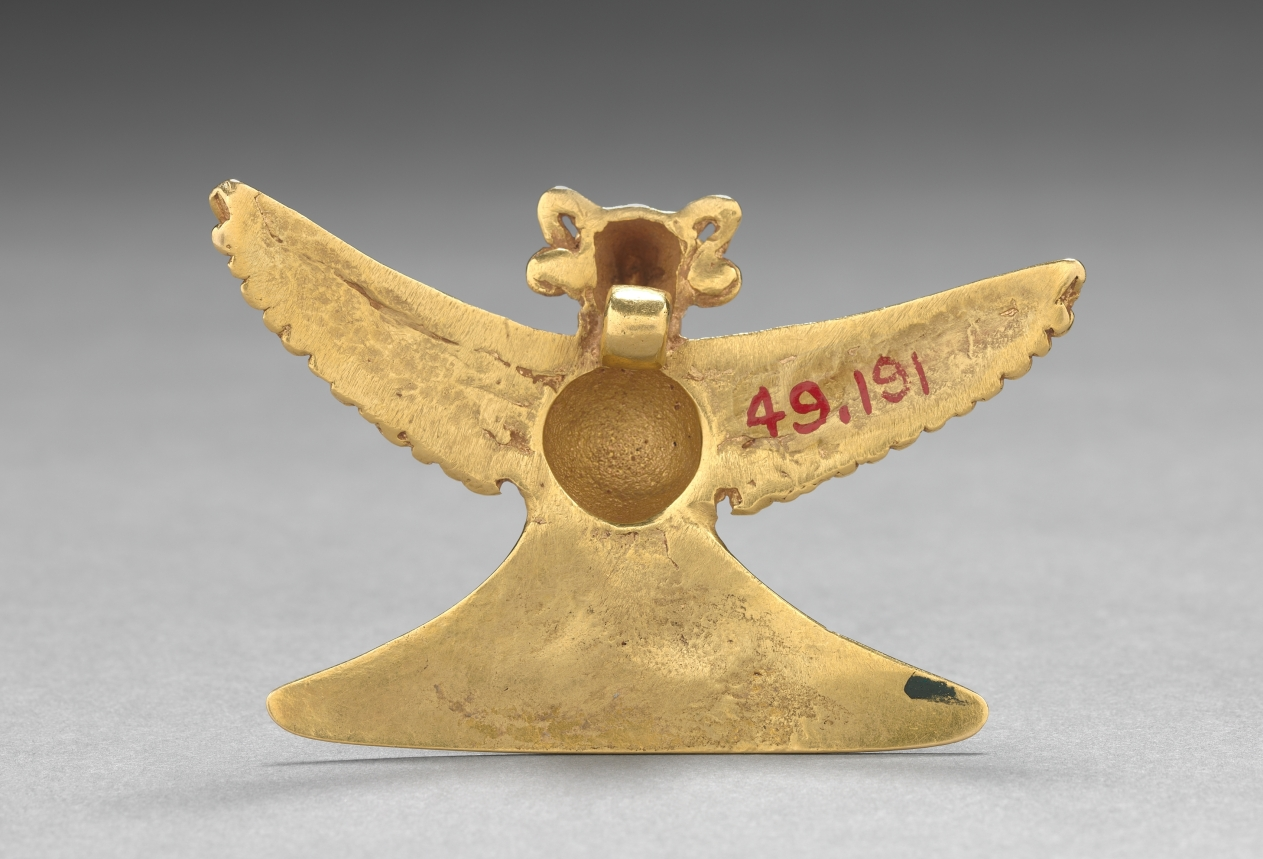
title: Eagle Pendant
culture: Western Panama, Veraguas-Gran Chiriquí Style, 11th-16th century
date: c. 1000–1550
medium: cast and hammered gold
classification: Metalwork